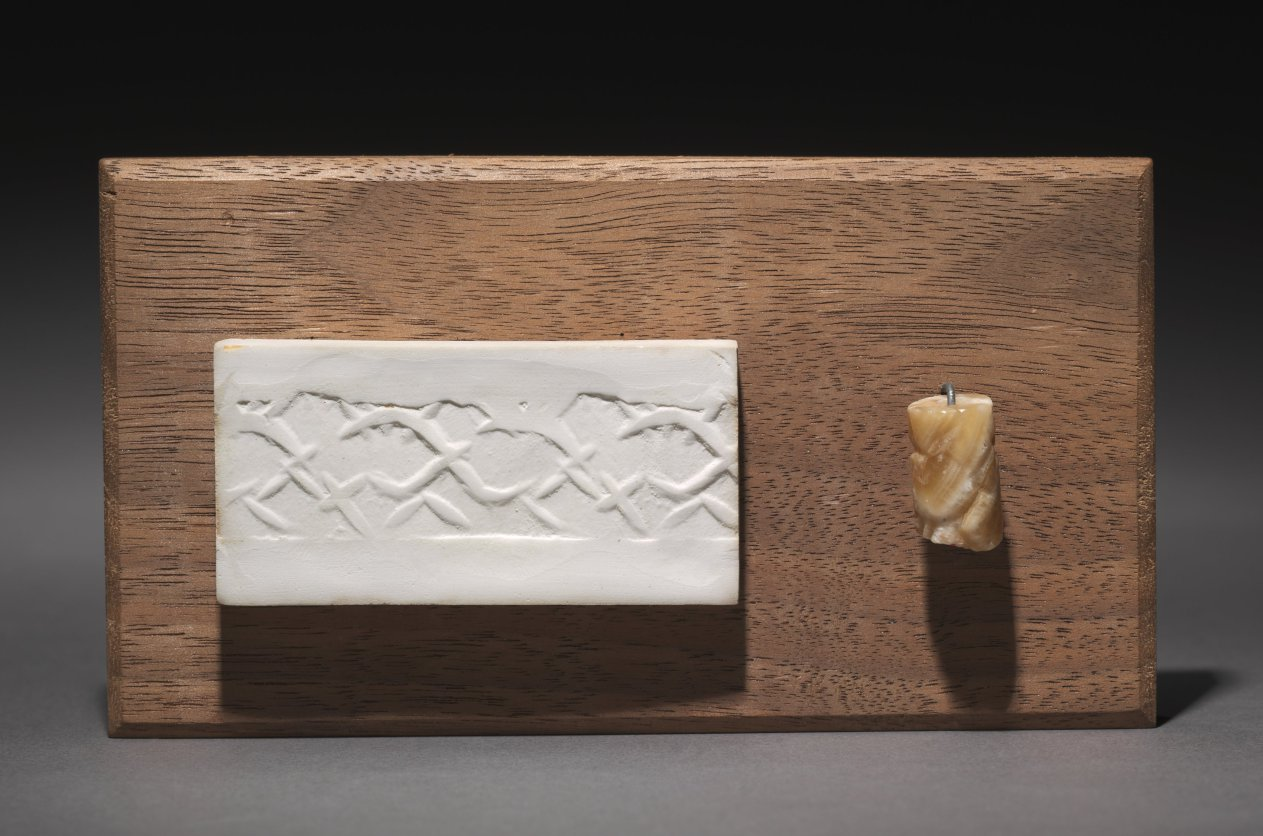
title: Cylinder Seal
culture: Mesopotamia, Early Dynastic period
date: c. 3000 BCE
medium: agate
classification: Seals